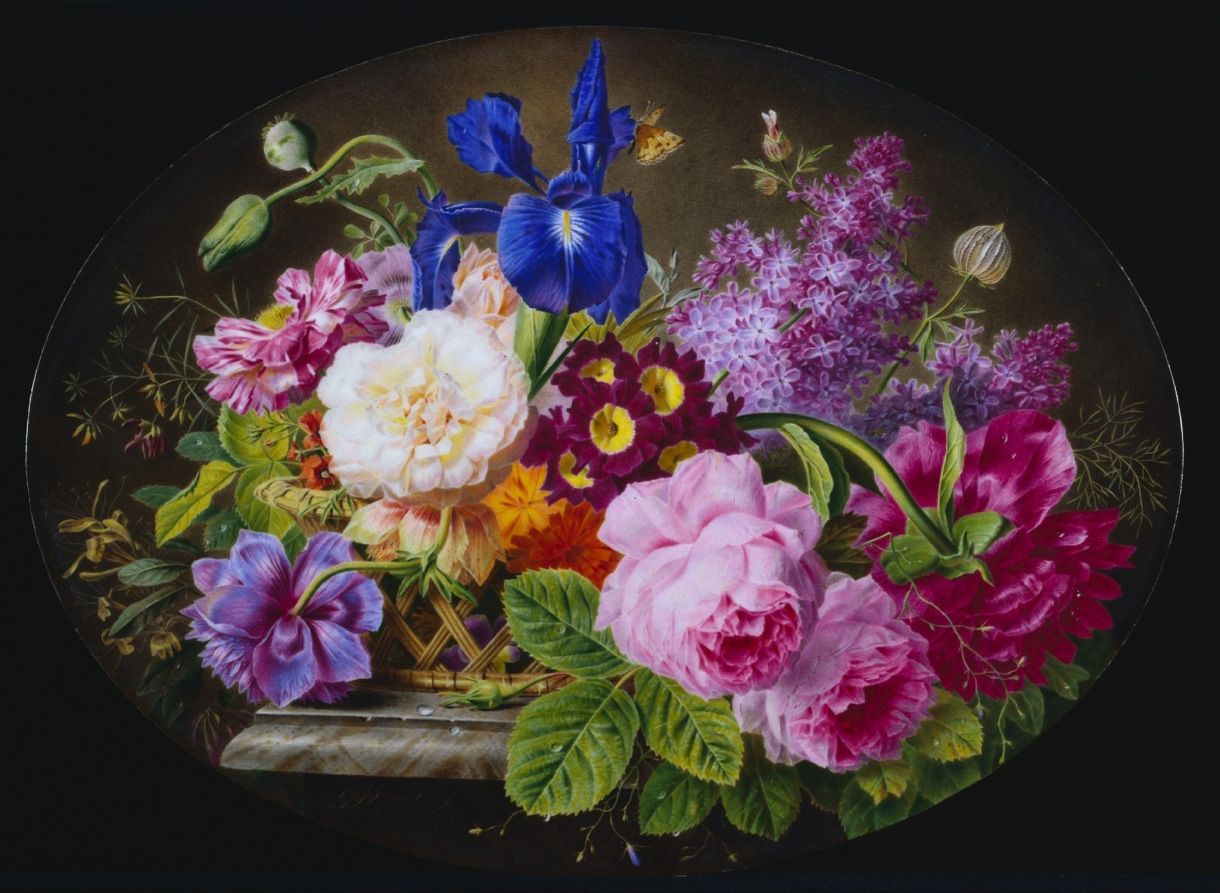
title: Plaque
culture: Netherlands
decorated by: Georgius Jacobius Johannes Van Os (Netherlandish, 1782–1861)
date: 1812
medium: porcelain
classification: Ceramic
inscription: signed lower left in ligature: G. J. J. Van Os.f.